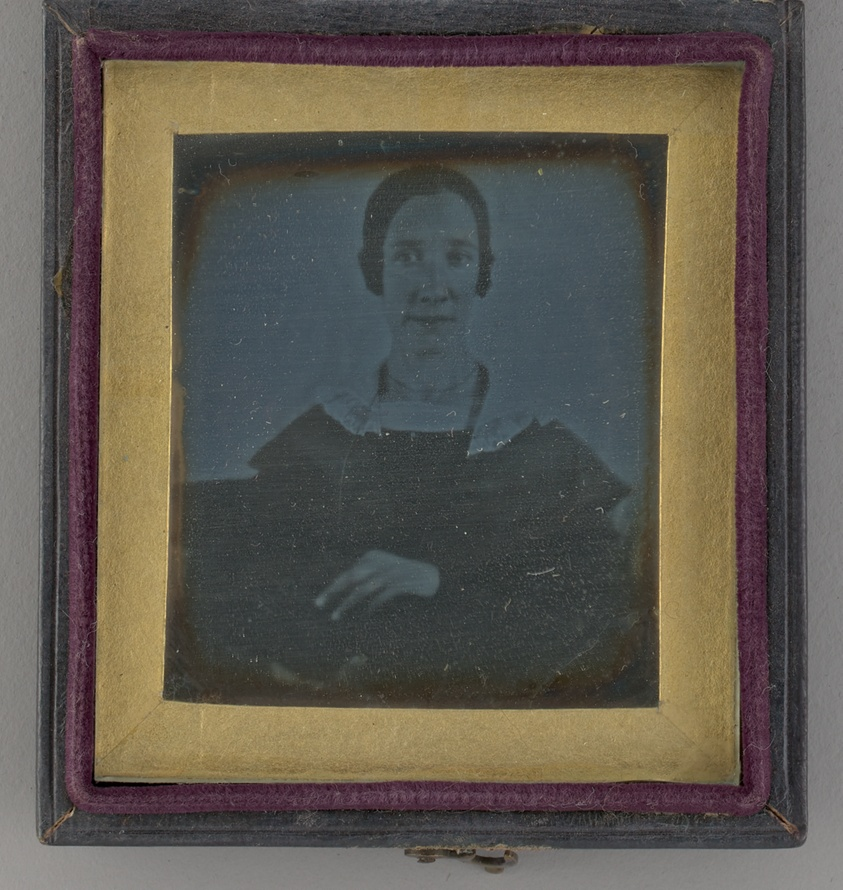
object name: Photograph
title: Untitled (Portrait of a Woman)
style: 19th century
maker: Unknown maker; American, 19th century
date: 1842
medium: Daguerreotype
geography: United States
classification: portrait; photograph; photographic process; photography; portrait; daguerreotype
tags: lundberg collection, portrait, female, portraits, portraits: female subject